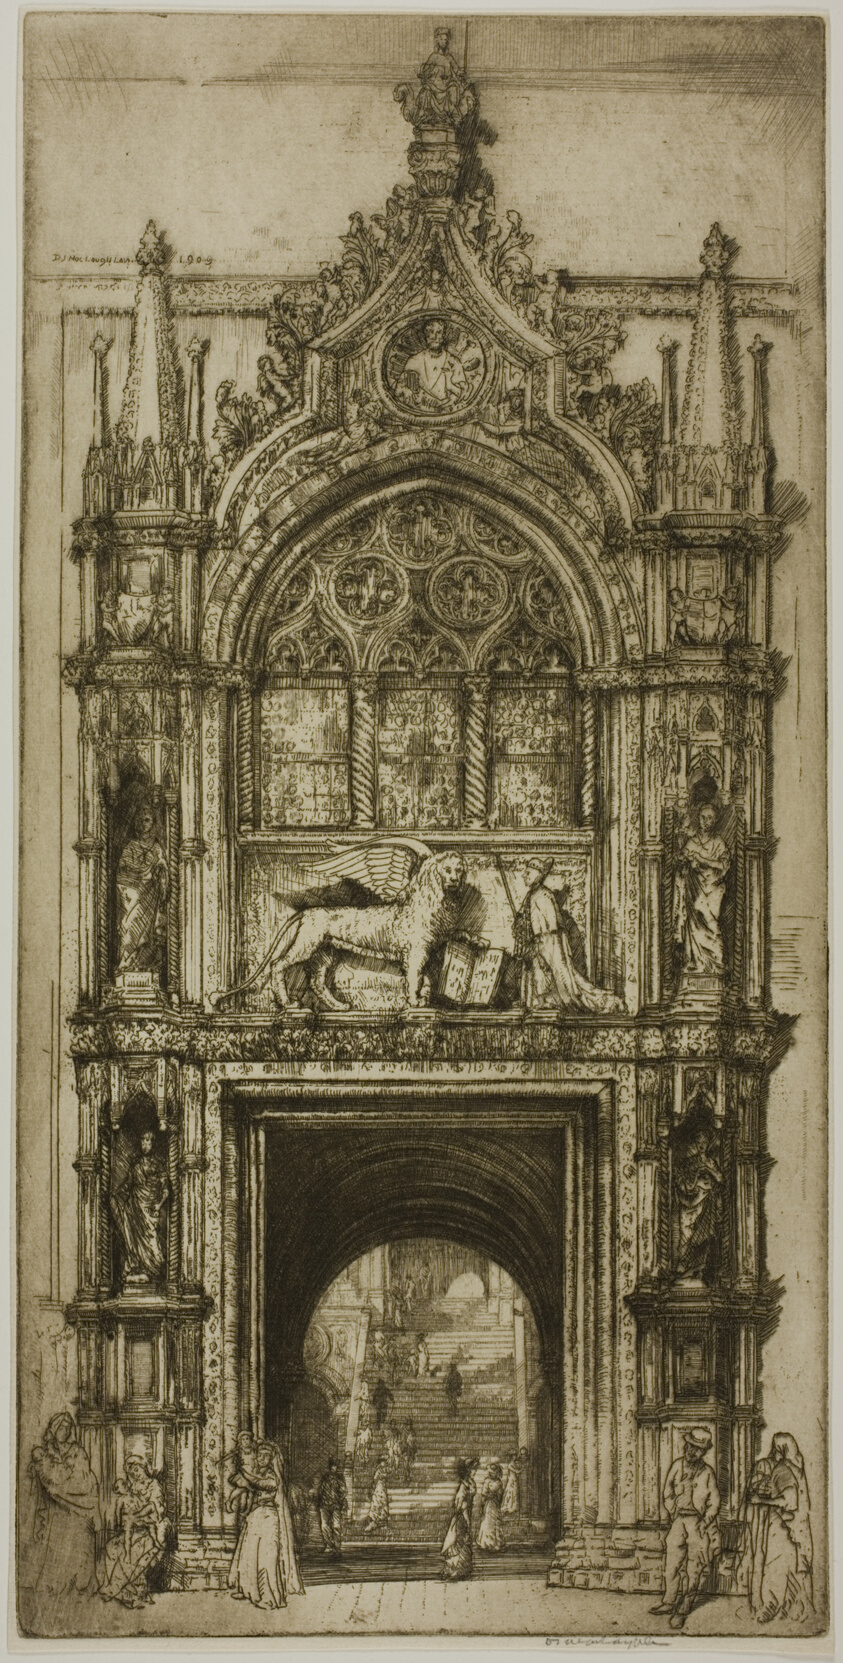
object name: Print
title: Doorway of the Doges', Venice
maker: Donald Shaw MacLaughlan (American, born Canada, 1876-1938)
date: 1909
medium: Etching in sepia on cream laid paper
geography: United States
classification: etching; print; prints and drawing